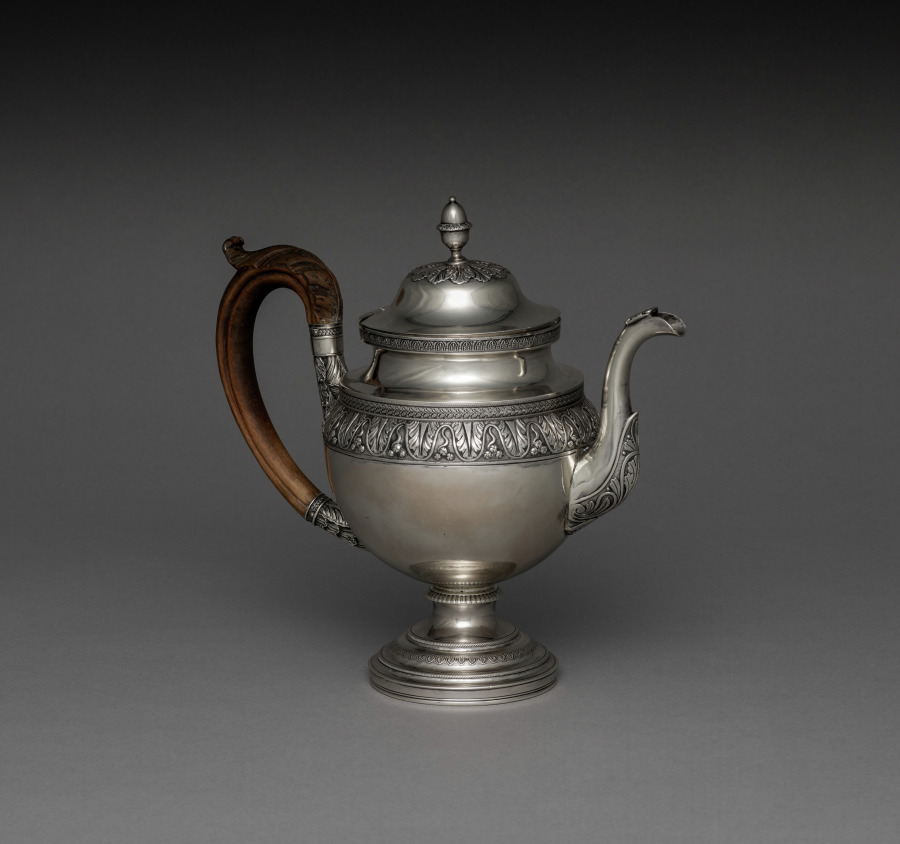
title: Covered Pot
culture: America, Pennsylvania, Philadelphia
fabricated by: after a design by Harvey Lewis (American, 1835)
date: c. 1811–25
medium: silver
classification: Silver